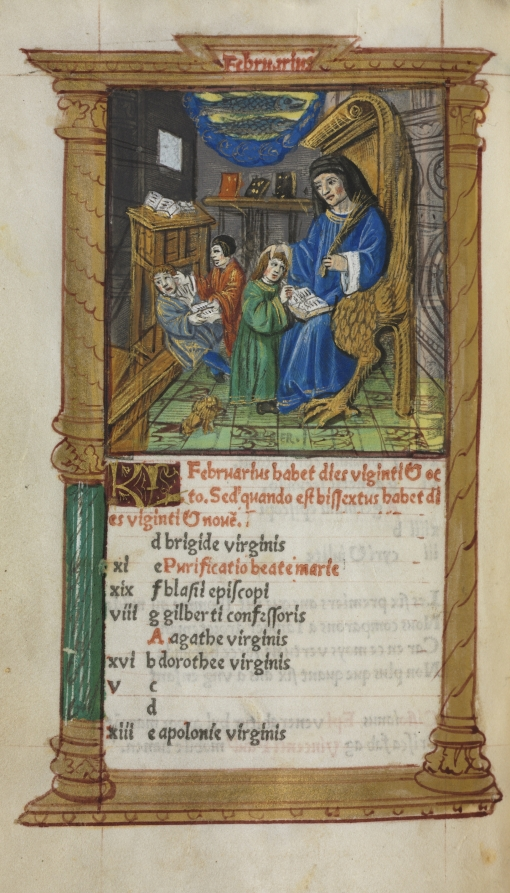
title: Printed Book of Hours (Use of Rome): fol. 3v, February calendar illustration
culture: France, Paris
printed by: Guillaume Le Rouge (French, Paris, active 1493–1517)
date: 1510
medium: 112 Printed folios on parchment, bound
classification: Bound Volume